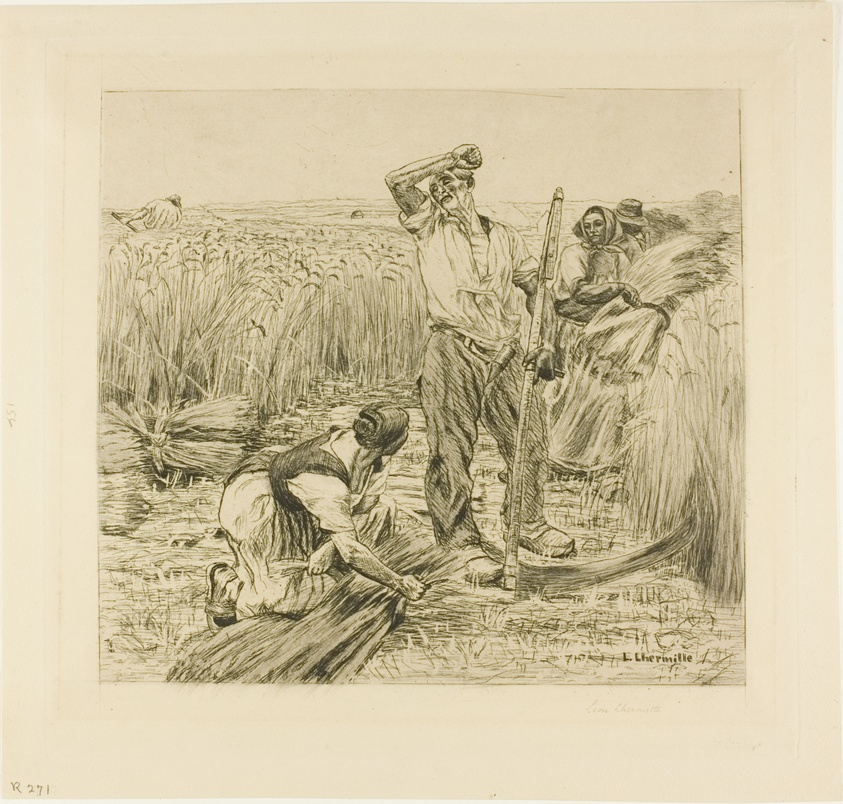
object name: Print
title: Harvest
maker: Léon Augustin Lhermitte (French, 1844-1925)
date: 1872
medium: Etching, aquatint, and scraping on tan wove paper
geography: France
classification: etching; print; prints and drawing